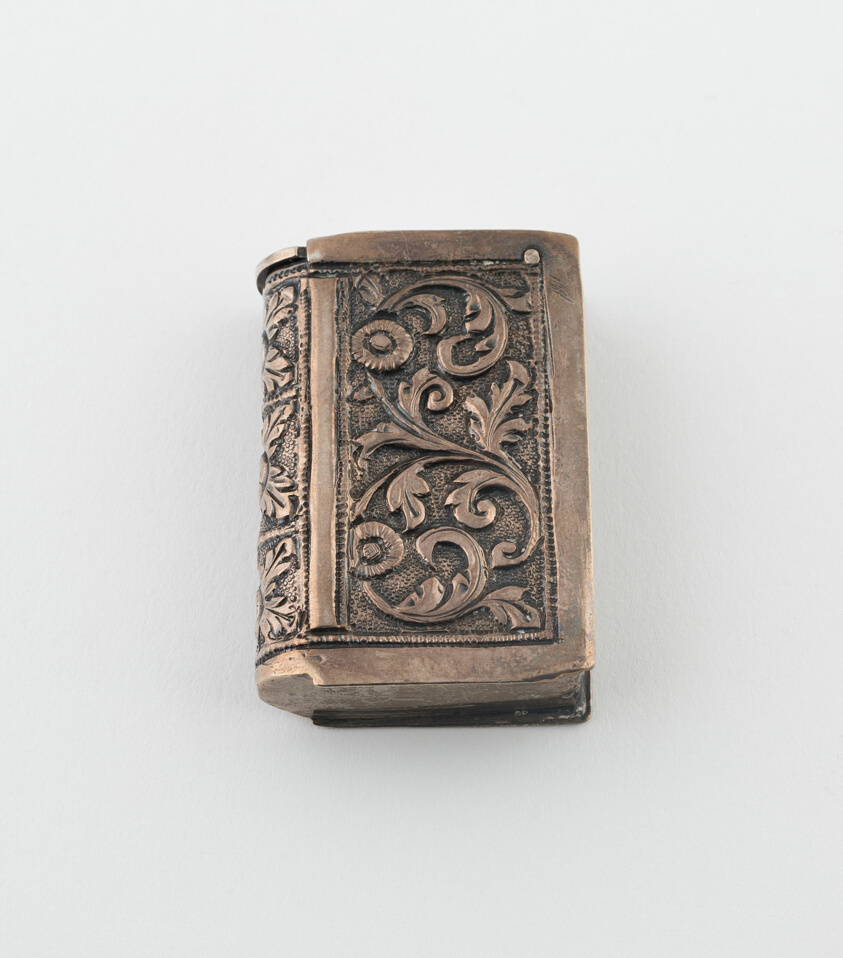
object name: Metalwork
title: Book-Shaped Match Safe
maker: Possibly England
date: c. 1880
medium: Silver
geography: England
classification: container for personal use; box; european decorative arts; metalwork; silver; decorative object/ornament